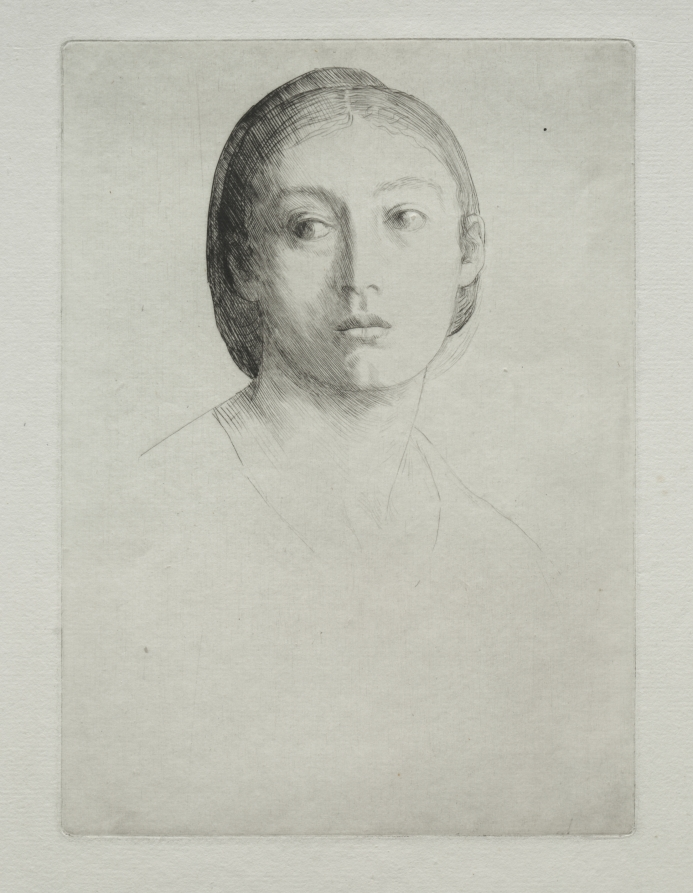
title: Head of a Young Girl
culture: France, 19th century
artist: Alphonse Legros (French, 1837–1911)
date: 1875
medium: drypoint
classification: Print